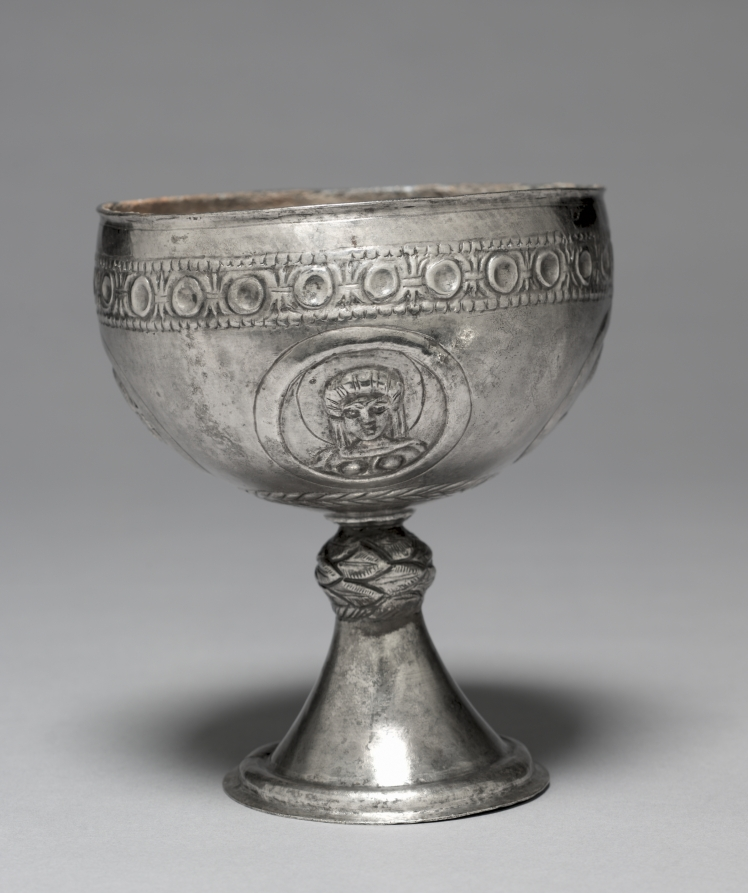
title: Chalice from the Beth Misona Treasure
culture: early Byzantium, Constantinople or Syria, Byzantine period, 6th-7th Century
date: c. 500–700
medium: silver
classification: Metalwork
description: These four liturgical silver vessels—a paten and three chalices (1950.378–81)—form what is now called the Beth Misona Treasure, named for the village in northern Syria for which the objects were made. While nothing is known about the exact location and circumstances of the treasure's discovery, the people of the village of Beth Misona were, like other Christian communities in Syria and Palestine, probably forced to bury their church silver to hide it from the Persians or Arabs, who conquered their lands in the first half of the 600s. The paten, which held pieces of Eucharistic bread used during Mass, is decorated with an engraved Latin cross surrounded by a dedicatory inscription that names the paten's donor—Domnos—and its original location, the church of Saint Sergios in Beth Misona. The chalices, which contained the Eucharistic wine used during Mass, feature broad cups decorated with portrait busts of Saints Peter and Paul, Christ, and the Virgin. One chalice bears a dedicatory inscription naming its donor—Kyriakos, Domnos's son—and the priest of the church that received the pious gift—Zeno.